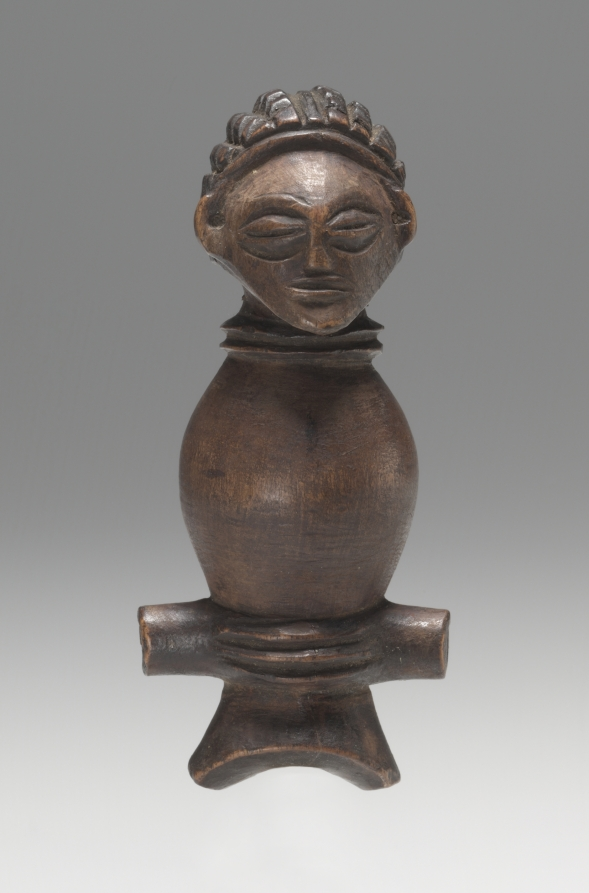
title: Whistle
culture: Central Africa, Democratic Republic of Congo or Angola, Chokwe people, late 19th century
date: late 1800s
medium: Wood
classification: Musical Instrument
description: Carved out of ivory or wood in a variety of shapes, Chokwe whistles often bear miniature, stylized renderings of masks. Cikunza, the "patron saint" of the boys' initiation into manhood, is depicted with a pointed extension imitating the horn of a road antelope, symbolizing the fertility spirit. Typically such whistles were used by men during the hunt to communicate with their co-hunters and to call their dogs. They were either worn attached to a string as a necklace or tied to a spear.